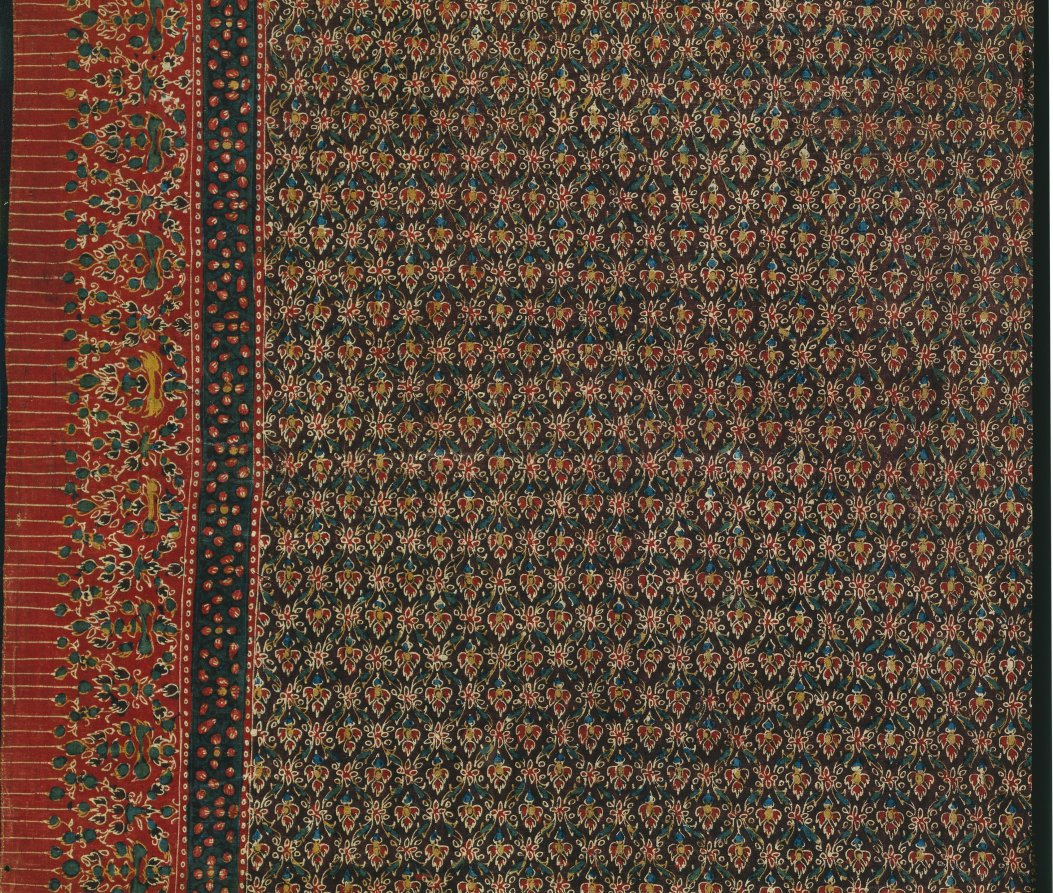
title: Loin Cloth "Pha nung" or Cloth for Wrapped Garment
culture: India, East Coast, late 19th - early 20th century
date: late 1800s-early 1900s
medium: tabby weave, mordant resist and batik; cotton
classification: Textile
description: Indian craftsmen developed great skill in resist dyeing using both mordants (chemicals that fix dyes) and wax, or some other resist. When mordants were selectively drawn, painted, or printed onto cotton, only those portions of the fabric would accept the dye. In this textile, this technique has been combined with wax resist batik that prevented dyes from penetrating treated portions of the fabric. Indian textiles made for export were patterned with designs and colors that suited the tastes of the markets for which they were produced. This cloth was made for export to Thailand where lattice designs were preferred. While this particular textile would have been used as a wrapped garment, Indian textiles in Thailand served also as room dividers, coverings for floors, and hangings.